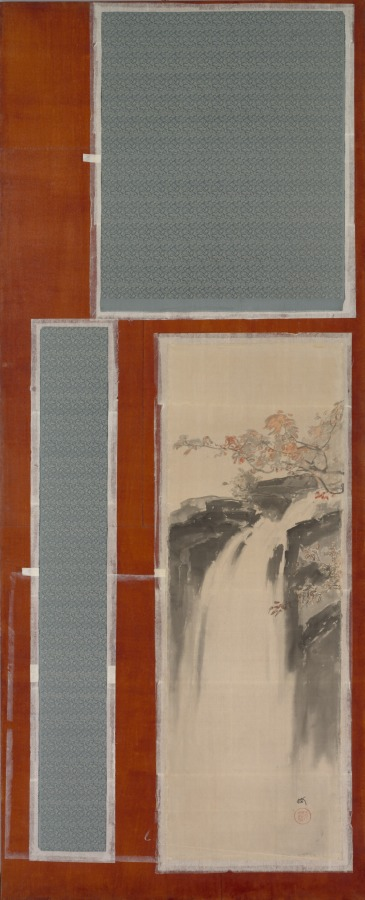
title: Waterfall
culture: Japan, Taishō period (1912–26)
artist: Yoshida Hiroshi (Japanese, 1876–1950)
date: 1924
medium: unmounted hanging scroll; ink and color on silk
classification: Painting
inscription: signed and stamped in lower right corner.